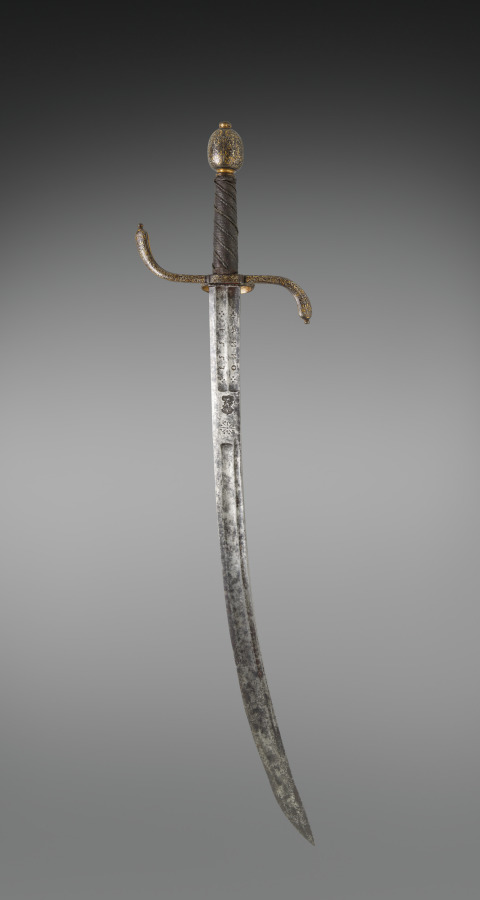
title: Hanger (Hunting Sword)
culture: Hilt: Italy (?); Blade: Germany, Saxony, late 16th-17th Century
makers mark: Jaspar Bongen the Younger (German, active late 1600s)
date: late 1600s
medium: steel; gold and silver damascened hilt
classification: Arms and Armor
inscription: "1553" (Presumed to be a commemorative date)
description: Damascening, the technique of hammering gold and silver wires into grooves cut to receive them, enlivens this sword's hilt. Further texture was added with wires to improve the user's grip, which allowed him to hunt with more control and accuracy. Hunting was a popular sport among the wealthy and many nobles owned tracts of forest, but peasants were prohibited from hunting on these lands.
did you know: The swordsmith's mark, a crowned stag visible on the blade below the hilt, is unidentified.